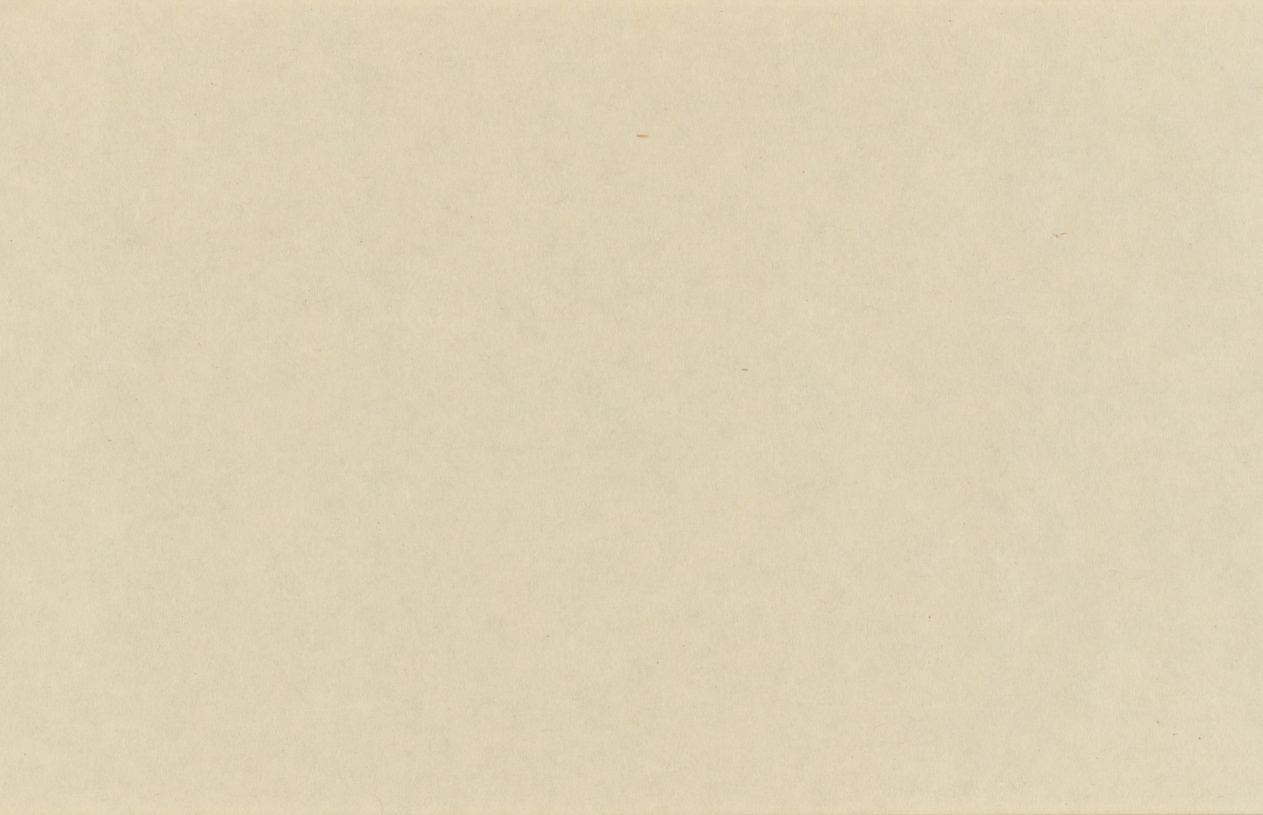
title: Eight Views of Xiao-Xiang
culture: Japan, Muromachi period (1392–1573)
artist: Sesson Shūkei (Japanese, c. 1492–c. 1577)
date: 1500s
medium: handscroll; ink on paper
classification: Painting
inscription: Signature and seal of artist at end of painting.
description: Eight Views of the Xiao and Xiang Rivers can be traced to 11th-century Chinese poems and paintings, the depiction of which had also become popular among Korean and Japanese painters. Xiao-Xiang refers to the region in present-day Hunan province where the Xiao and Xiang rivers converge. Few painters of the Eight Views had in fact seen the scenery; rather, they were trying to portray in ink and wash the lyrical qualities of dim light and a misty atmosphere typical of that region. Each of the poetic titles suggests a time of day, a season, or specific atmospheric conditions—subjects that challenged the abilities of the most talented artists. In this miniature painting (shukuzu) of the Muromachi period, Japanese Zen monk and painter Shukei Sesson depicted all eight views featured in Chinese prototypes: Wild Geese Descending to Sandbar; Returning Sails Off a Distant Coast; Mountain Market in Clearing Mist; River and Sky in Evening Snow; Autumn Moon over Dongting Lake; Night Rain on the Xiao and Xiang; Evening Bell from Mist-Shrouded Temple; and Fishing Village in Evening Glow.